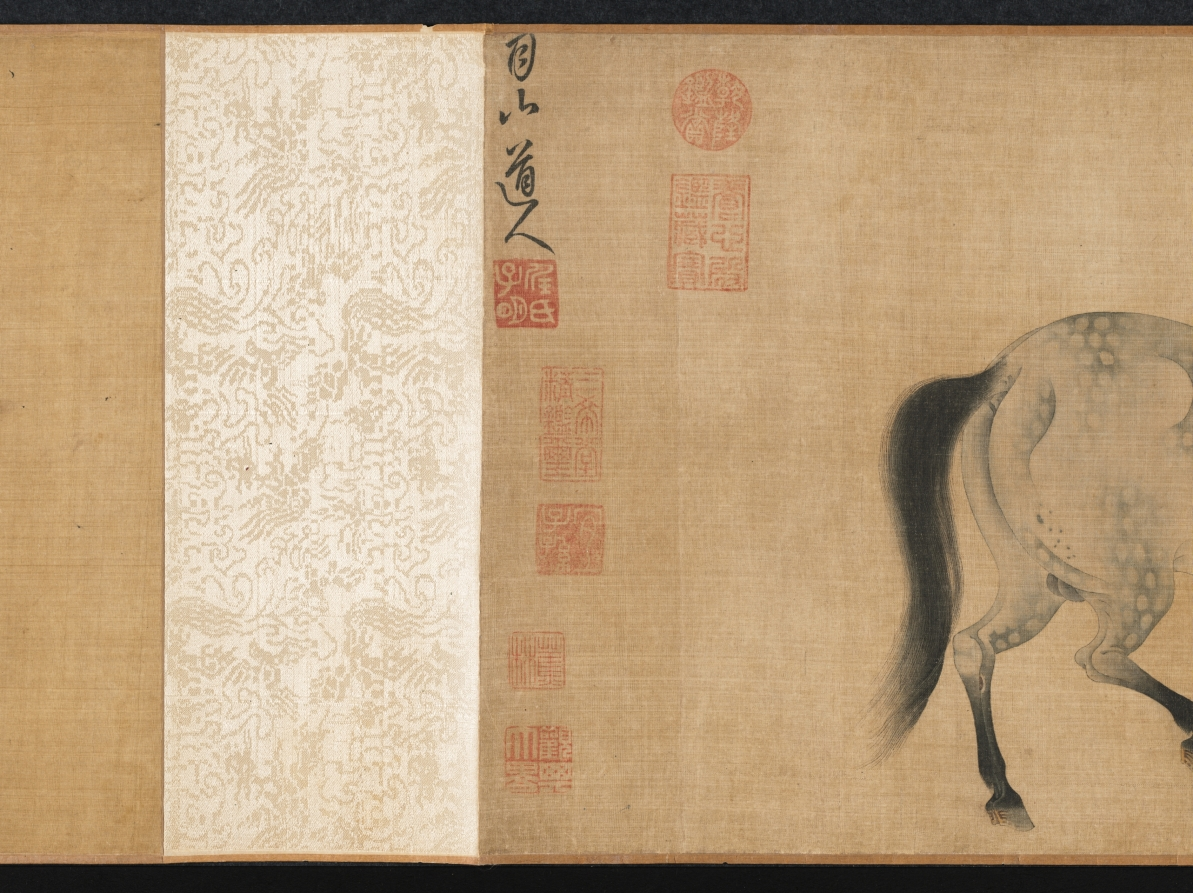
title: Three Horses and Four Grooms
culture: China, Yuan dynasty (1271-1368)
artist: Ren Renfa (Chinese, 1254–1328)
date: c. 1320s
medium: handscroll, ink and color on silk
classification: Painting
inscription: 月山道人. [印] 任氏子明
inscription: 1 colophon and 16 additional seals: 1 poem, 1 colophon dated 1552 or 1612, and 3 seals of Wang Yiying 王一瀛 (1500s); 2 seals of Liang Qingbiao 梁清標 (1620-1691); 6 seals of the Qianlong 乾隆 Emperor (r. 1736-95); 3 seals of the Jiaqing 嘉慶 Emperor (r. 1796-1821); 1 seal of the Xuantong 宣統 Emperor (r. 1908-12); 1 seal of Yu Xiezhong 余協中 (1900s).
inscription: Poem and colophon by Wang Yiying 王一瀛 (1500s): As for painters of horses in the previous dynasty, Surely the name of Yueshan [Ren Renfa] must come first. Under his brush and on his silk, They seem to have just galloped out from the imperial stud. Now as the world overflows with inferiority, Who, from the stable, can recognize a dragon-horse amidst mediocrity. Ren Yueshan [Ren Renfa] of the Yuan Dynasty was best in horse paintings. The three fine steeds he painted in this scroll are so dashing, so vigorous in spirit that they have indeed grasped some of the "brush-idea" of Han Gan. Not long ago this painting came into the possession of Mr. Gui Shanquan, who asked for my inscription. And I, while reading the old manuscripts of Hengshan [Wen Zhengming, 1470-1559], by accident, came cross the poem quoted above. As the ancients said "in painting horses, Master Han was [inspired by and produced] real horses; in composing poems, Master Su [Su Dongpo, the leading Song poet] wrote as if a painting were before him." These are truly what should be considered the two excellences; indeed, they are to be treasured. In the sixth month of the renzi year [either 1552 or 1612]. Jian feng shan ren [The Mountain Dweller of the Sword Peak], Wang Yiying, written in the Qu si ting Pavilion at Chiyang.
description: Ren Renfa's horse images are elegant in appearance and vigorous in spirit. His work attracted not only Chinese scholars but also the Mongols at the imperial court. Inspired by the contemporary scholarly interest in restoring a sense of antiquity in art—an artistic direction led by Zhao Mengfu that exerted a great impact in the Yuan art scene—Ren Renfa, like Zhao Mengfu, modeled his depictions of horses after the Song master Li Gonglin. Another key style component that Ren introduced to this genre was a revival of the Tang classical tradition. The refined color treatment of the horses as seen here was derived from the Tang master Han Gan.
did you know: Only the elegant first horse with a white blaze is accompanied by two grooms, as if its lightning speed required extra supervision.